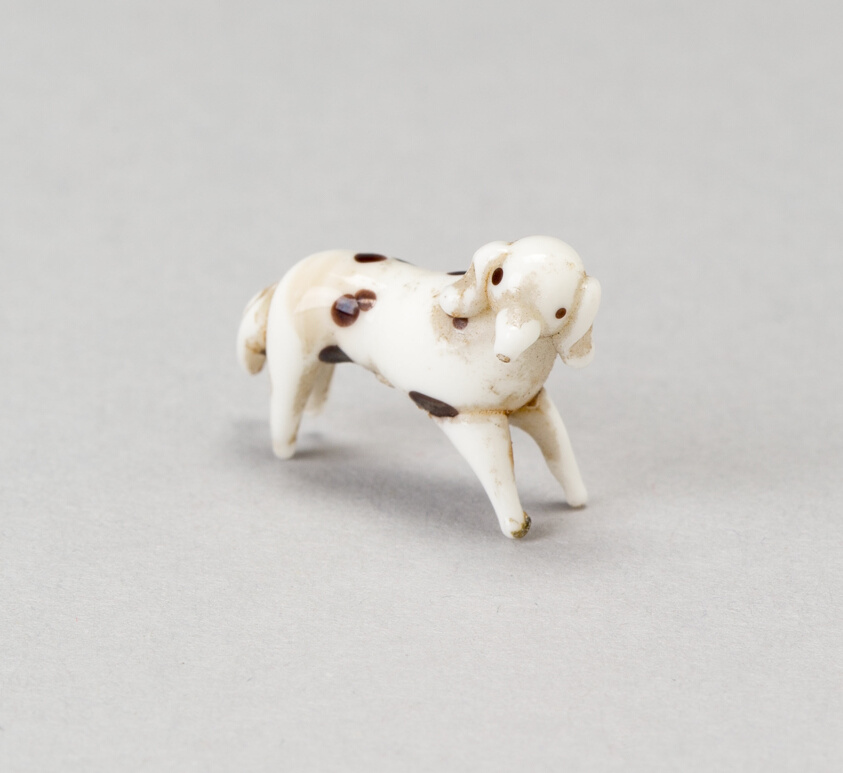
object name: Glass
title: Dog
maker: Nevers, France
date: 18th century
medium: Glass; lampwork (verre de Nevers), metal armature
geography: France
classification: decorative object/ornament; lampwork; glass; european decorative arts